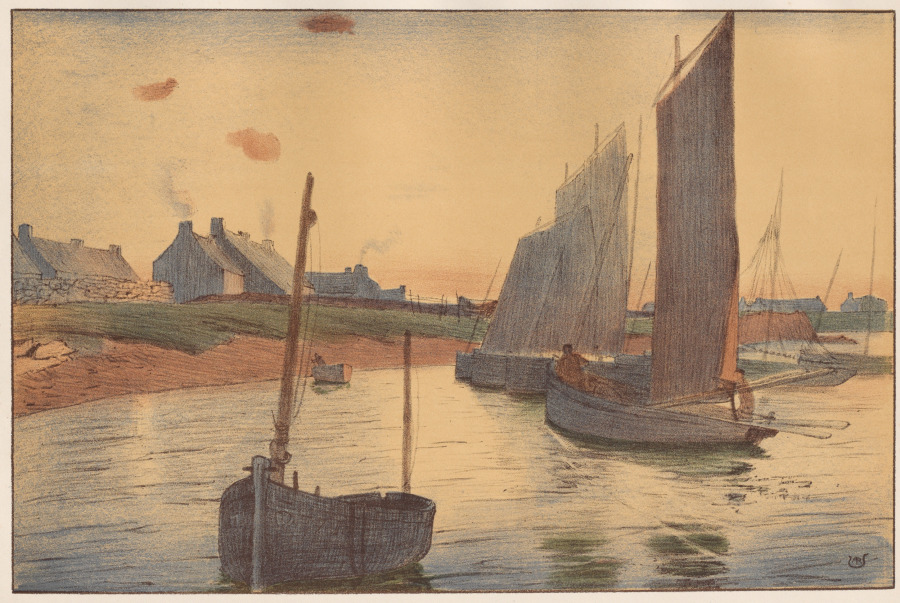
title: Tristesse sur la Mer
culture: France, Paris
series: L'Estampe Moderne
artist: Raoul André Ulmann (French, 1867–1932)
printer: Imprimerie Champenois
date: 1898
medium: Color lithograph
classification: Bound Volume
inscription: Lower right corner of image: RA inside a large U; upper right corne of sheet: blindstamp of l'Estampe Moderne (Lugt 2790)